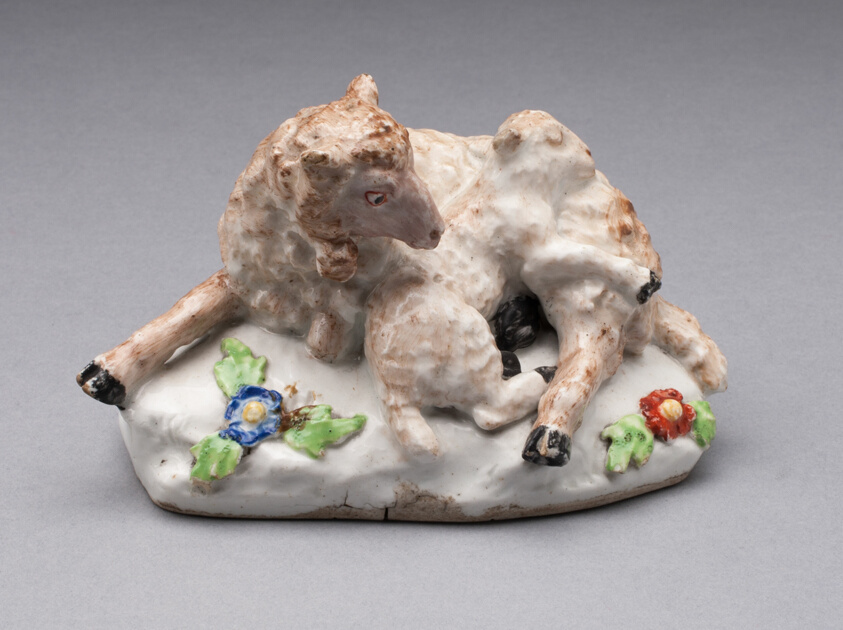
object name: Ceramics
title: Ewe and Lamb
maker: Bow Porcelain Factory (London, England, 1744-1775)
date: 1752/54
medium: Soft-paste porcelain, polychrome enamels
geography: Bow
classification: porcelain; european decorative arts; ceramics